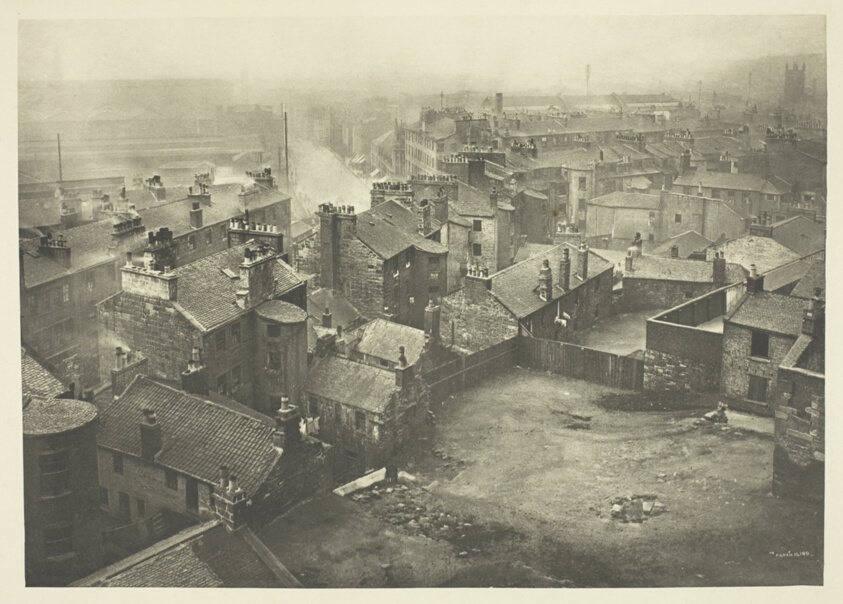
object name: Photograph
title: Old Houses Corner of George Street and High Street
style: 19th century, Pictorialism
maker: James Craig Annan (Scottish, 1864-1946)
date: 1897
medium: Photogravure, plate 40 from the book "The Old Closes & Streets of Glasgow" (1900)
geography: Scotland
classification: photograph; photography